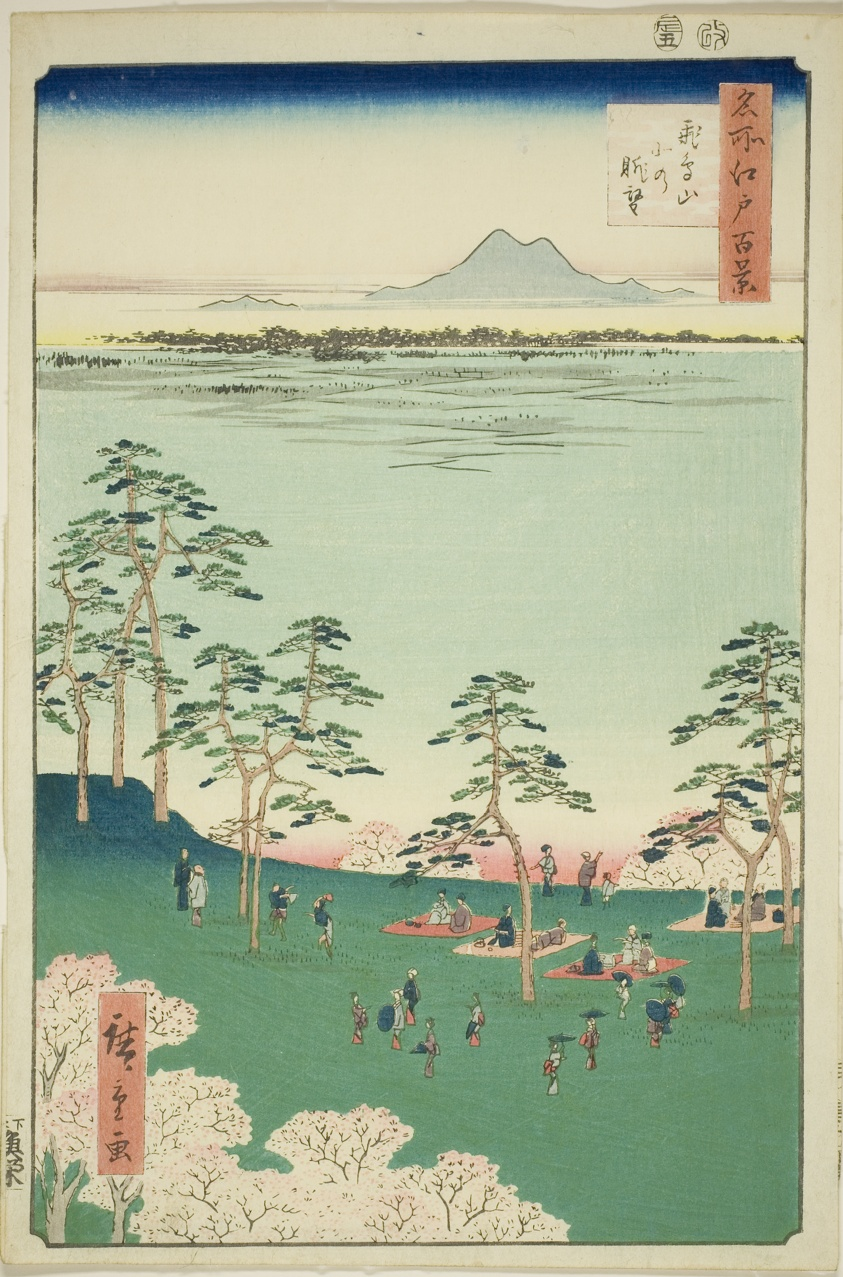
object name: Print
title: View to the North from Asuka Hill (Asukayama kita no chobo), from the series "One Hundred Famous Views of Edo (Meisho Edo hyakkei)"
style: Japanese (culture or style)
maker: Utagawa Hiroshige 歌川 広重; Japanese, 1797-1858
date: 1856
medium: Color woodblock print; oban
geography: Japan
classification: woodblock print; print; asian art